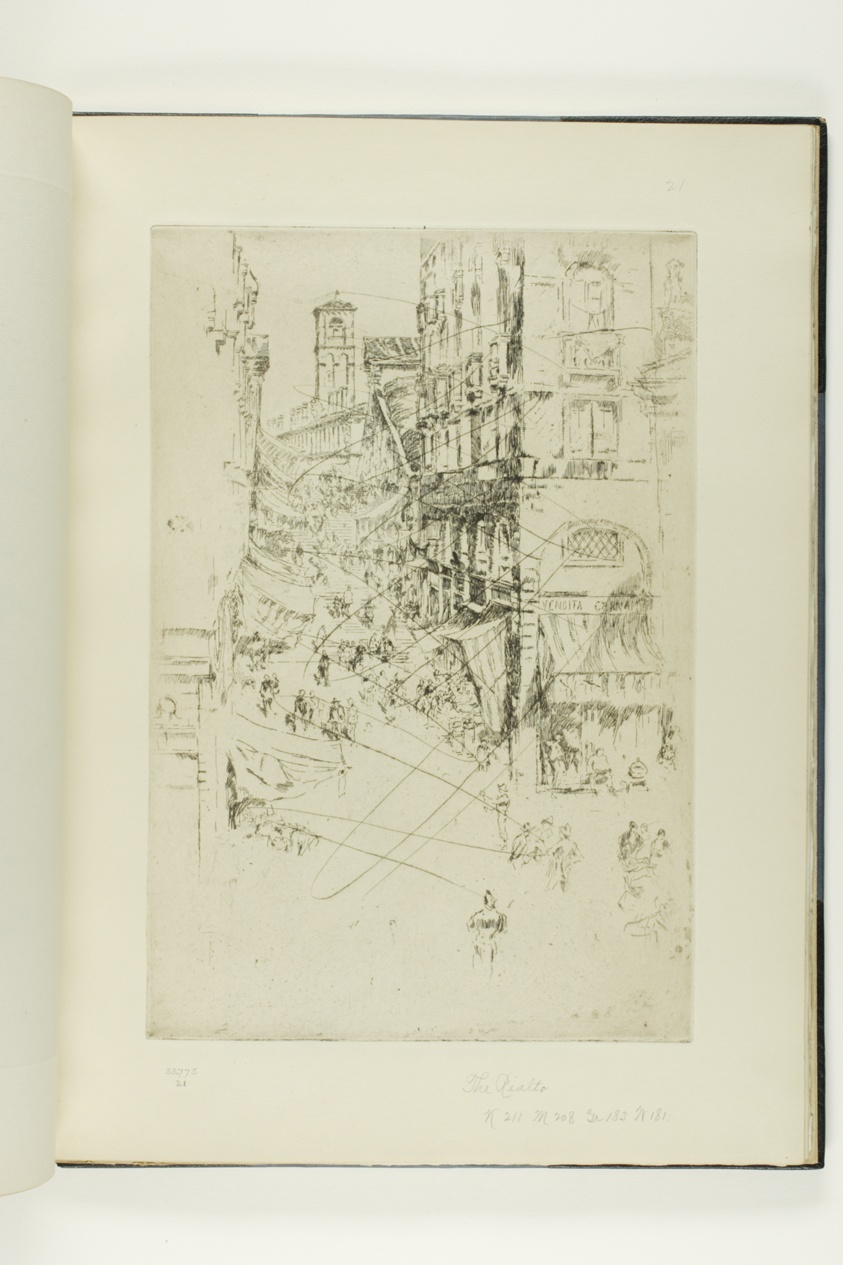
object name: Print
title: The Rialto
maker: James McNeill Whistler (American, 1834-1903)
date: 1879/80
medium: Etching and drypoint with foul biting, with drypoint cancellation, in black ink on ivory laid paper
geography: United States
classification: etching; prints and drawing; print; foul biting; drypoint; book; paper